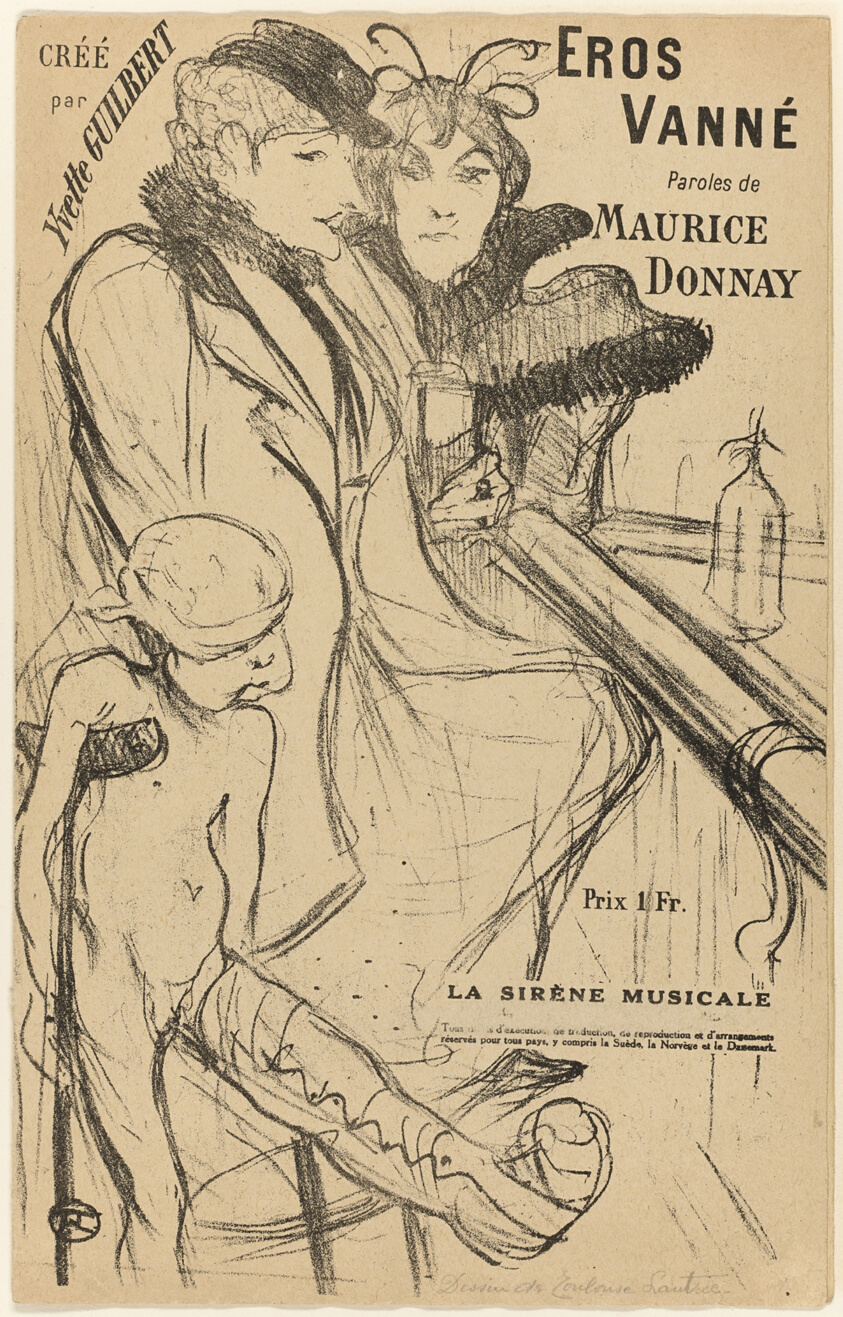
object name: Print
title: Eros vanné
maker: Henri de Toulouse-Lautrec (French, 1864-1901)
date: 1894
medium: Lithograph in black on tan wove paper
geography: France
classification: lithograph; print; prints and drawing